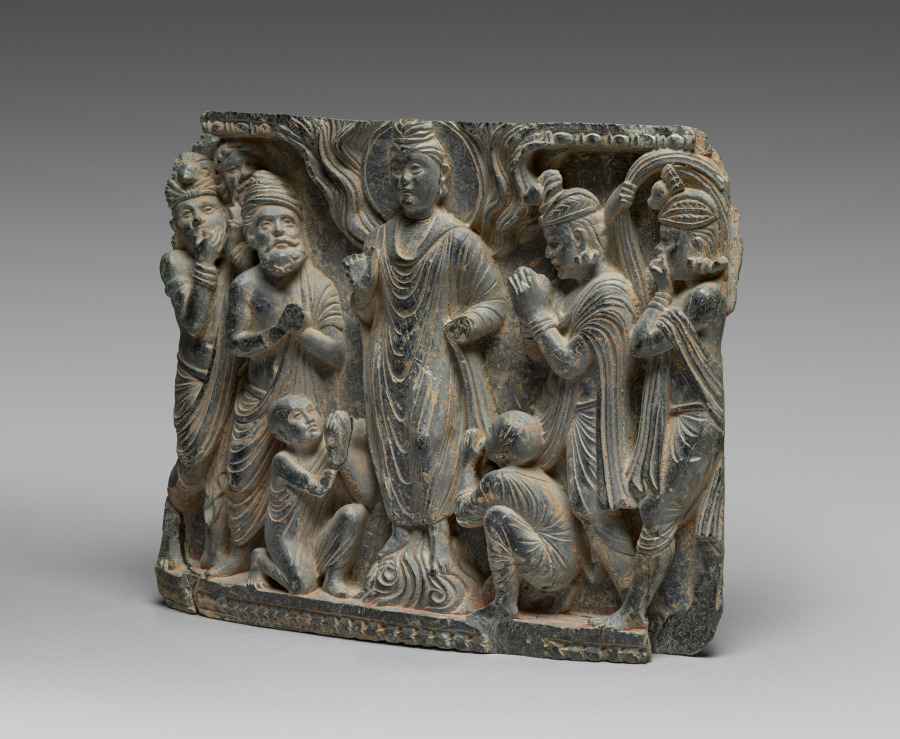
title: The Great Miracle at Shravasti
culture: Pakistan, Gandhara, Peshawar Valley, early Kushan period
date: c. 100 CE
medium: schist with traces of gold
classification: Sculpture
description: After the Buddha reached enlightenment, he spent the remainder of his life traveling around northeastern India, giving teachings and performing miracles in order to convert followers and establish the Buddhist community. One of his most famous miracles is when he levitated and caused fire to leap from his shoulders and water to flow from his feet. The figures of two monks kneel in worship. Others press their hands together in a sign of devotion and submission, while the figures on the outer edges whistle and shake their upper garments, as was customary when an amazing sight was seen.